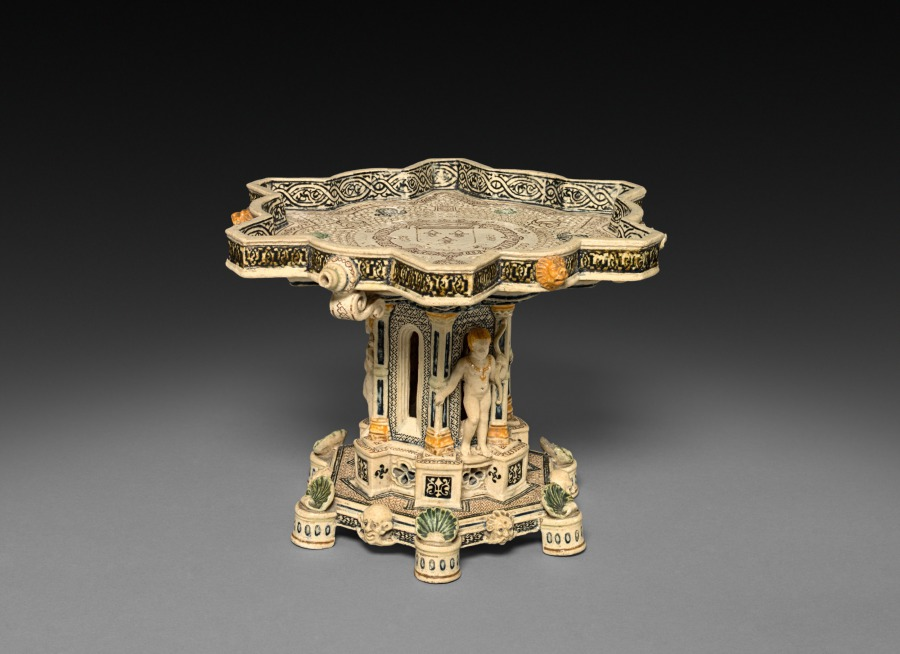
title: Pedestal Dish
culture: France, 19th century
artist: after Saint-Porchaire (French)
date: 1800s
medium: white earthenware with inlaid decoration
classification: Ceramic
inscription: in center of dish, arms and crown of France encircled by chain of Order of St. Louis, around which are interlaced initials DDH [monogram of Henri II] and three interlaced crescents (device of Diane de Poitiers).